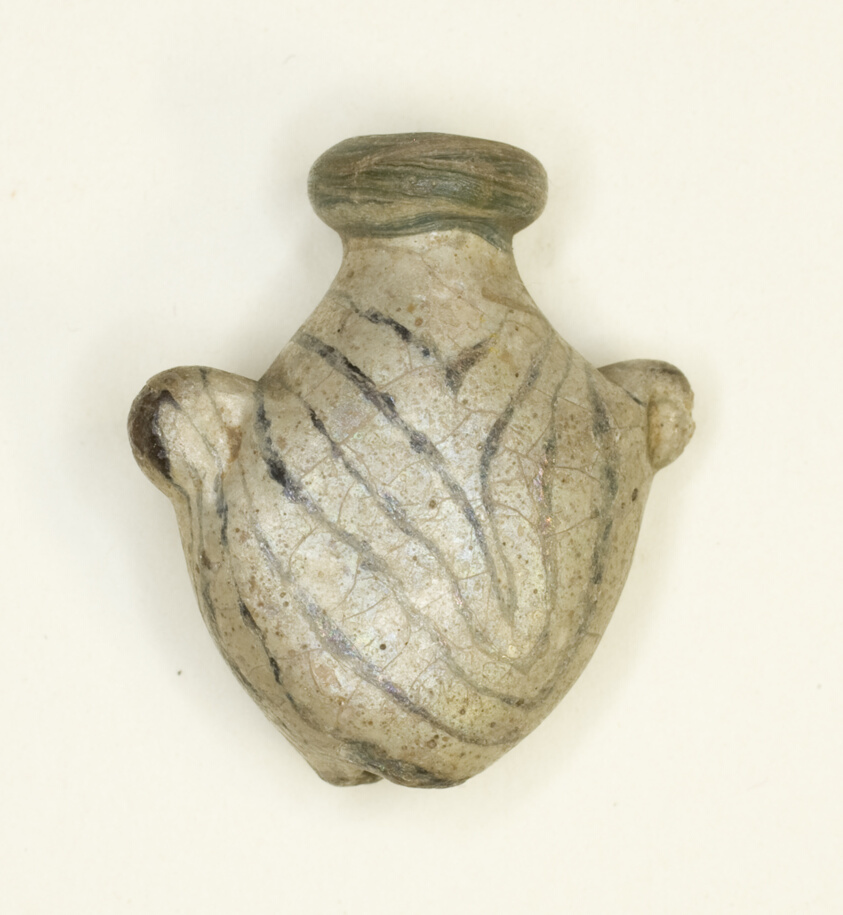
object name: Costume and Accessories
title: Amulet of a Heart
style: new kingdom, egyptian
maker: Egyptian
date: New Kingdom (about 1550–1069 BCE)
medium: Glass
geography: Egypt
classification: amulet; jewelry; ancient art; bead; costume